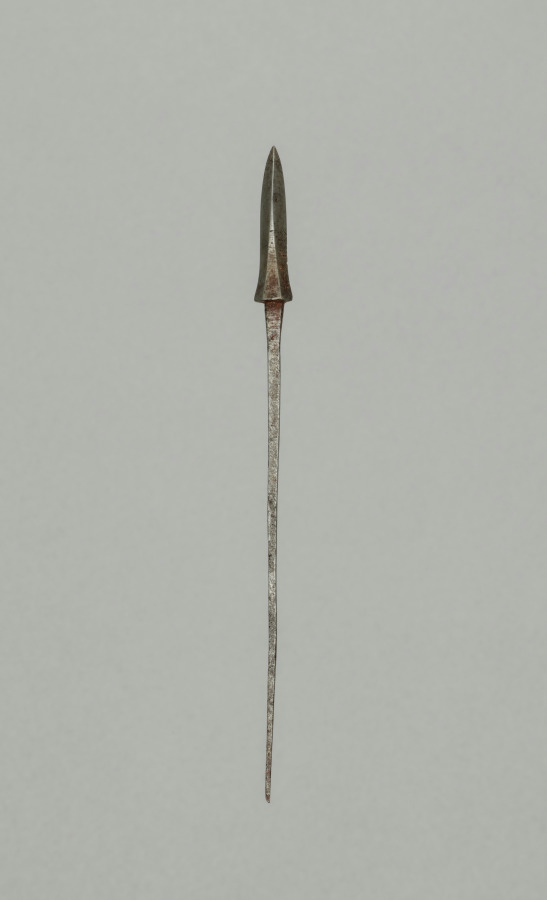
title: Arrow Point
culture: Japan, Edo period (1615–1868)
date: 1700s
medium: steel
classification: Arms and Armor